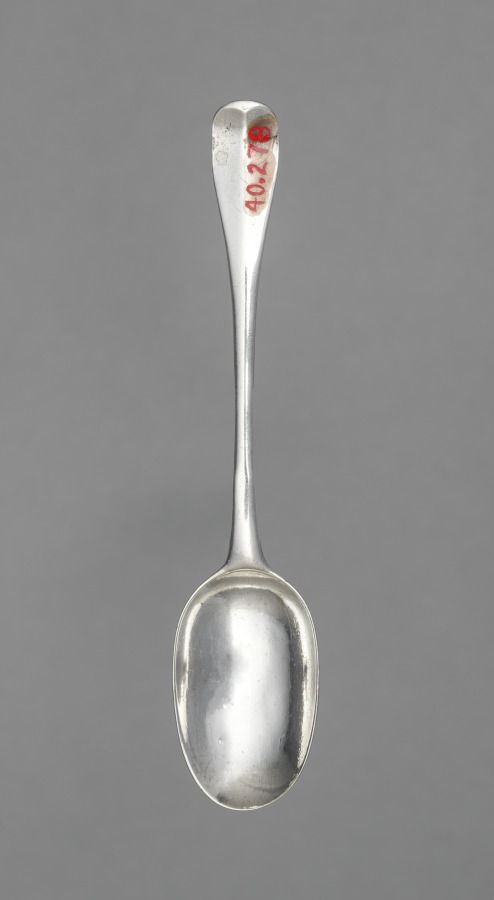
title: Teaspoon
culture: America, Rhode Island, Newport, 18th century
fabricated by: Samuel Vernon (American, 1683–1737)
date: c. 1720–1735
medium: silver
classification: Silver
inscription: engraved "E * M" on back of handle end (very worn).